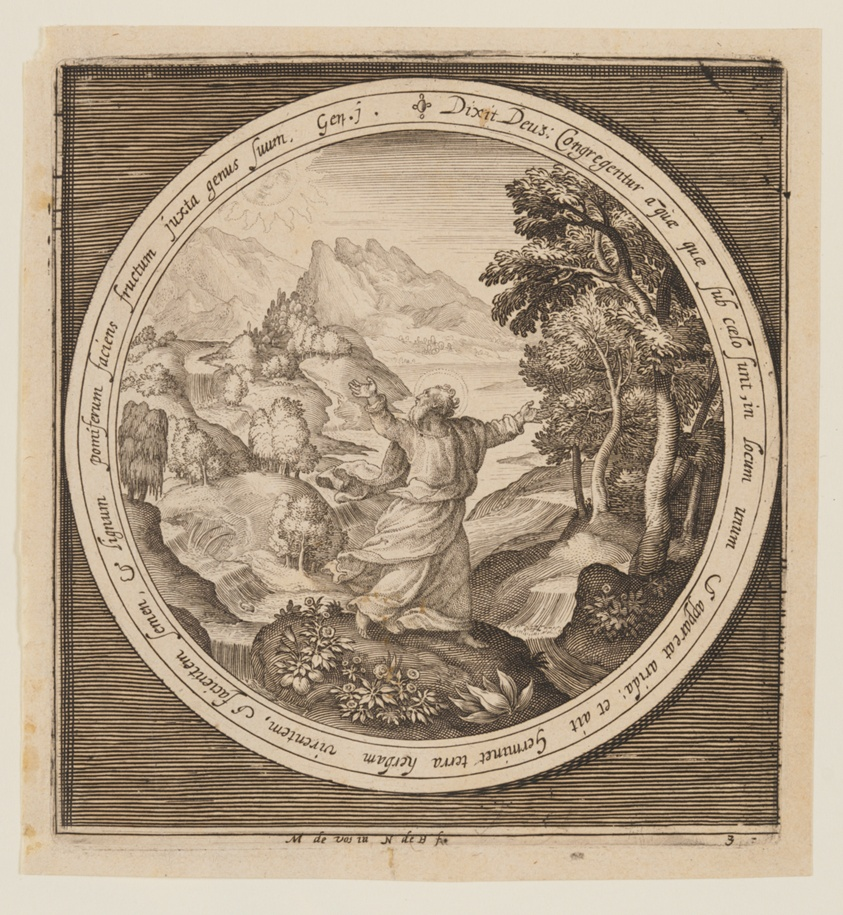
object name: Print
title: Third Day: The Creation of Land and Vegetation, from The Creation to the Expulsion from Paradise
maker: Nicolaes de Bruyn (Flemish, 1571–1656); after Maarten de Vos (Flemish, 1532–1603)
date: c. 1610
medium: Engraving on ivory laid paper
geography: Flanders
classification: engraving; paper; print; prints and drawing